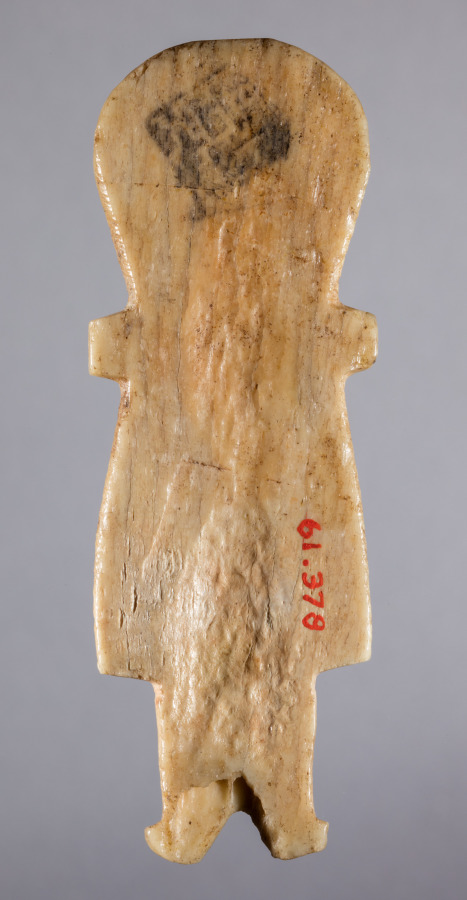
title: Figurine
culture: Iran, early Islamic period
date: 700s - 900s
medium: bone, incised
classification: Miscellaneous